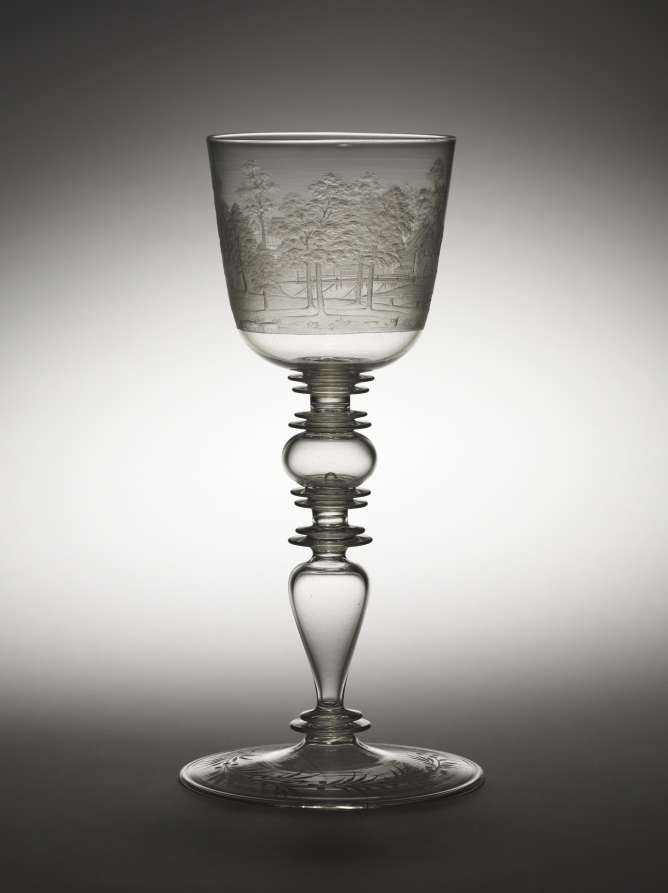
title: Goblet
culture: Bohemia, 17th century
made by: Hermann Schwinger (German, 1640–1683)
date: c. 1680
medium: glass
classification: Glass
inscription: signed and dated. Two inscriptions, one appears on the log held by two men: Es Ruhet auf beiden (It rests on both); the other appears below the scene: Deine Last ist meine Last. Ruhert du so habe ich Rast (Your burden is my burden. It you rest then so have I rest).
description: View of the Panierplatz in Nuremberg, and Allegory.